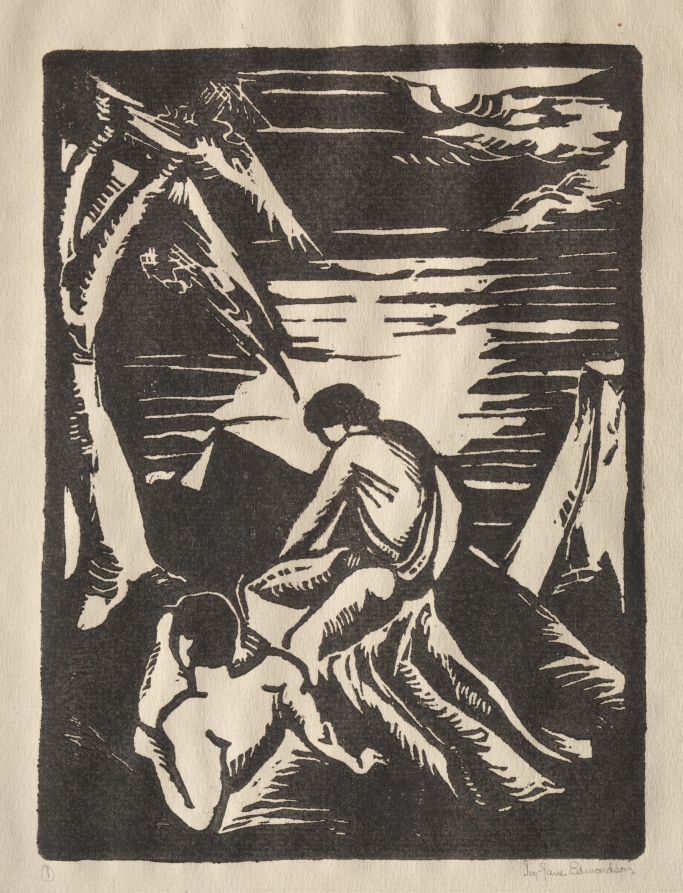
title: Orestes and Pylades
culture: America, Ohio, Cleveland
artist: Ivy Jane Edmondson Starr (American, 1909–2011)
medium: linoleum cut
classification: Print